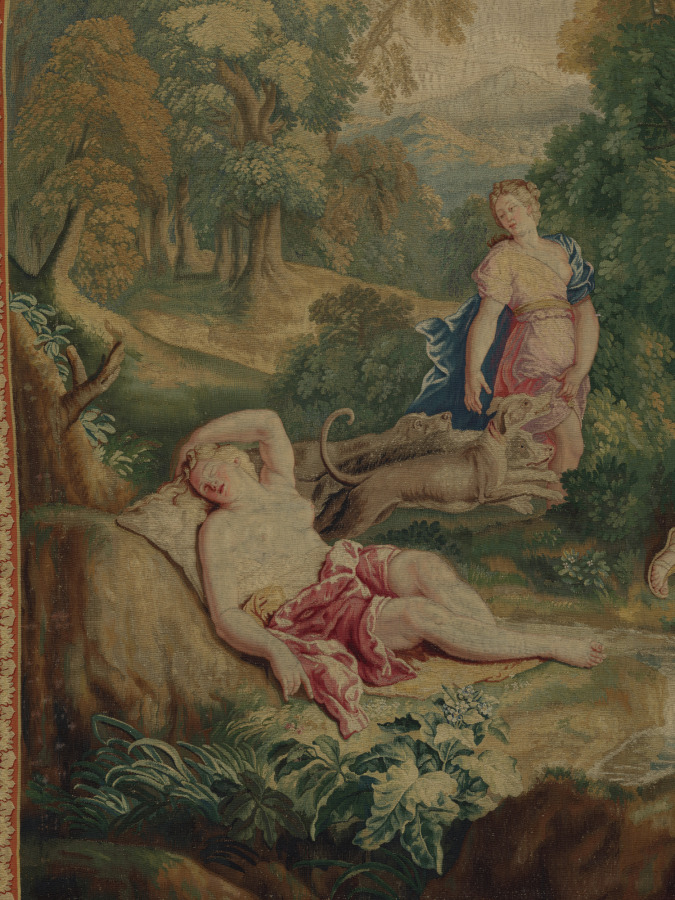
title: Diana's Return from the Chase (from Set of Ovid's Metamorphoses)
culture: France, 18th century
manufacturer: Gobelins Manufactory (France, Paris, est. 1662)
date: 1704–1731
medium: tapestry weave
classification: Tapestry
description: This tapestry’s elaborate border emulates a gilt picture frame, a key characteristic of eighteenth-century Gobelins tapestries. It portrays the goddess Diana at two distinct moments, during and following the hunt, the first accompanied by three dogs, and the second reclining among five attendants. The figures are positioned in a lush landscape near a small stream. A putto, poised to place an arrow in his bow, hovers above Diana. Goddess of the hunt and associated with wild animals and the moon, Diana can be identified by the crescent worn above her forehead. The dead hares indicate a successful hunt.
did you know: During the French Revolution, Gobelins tapestries were sometimes disassembled to harvest the gold threads.